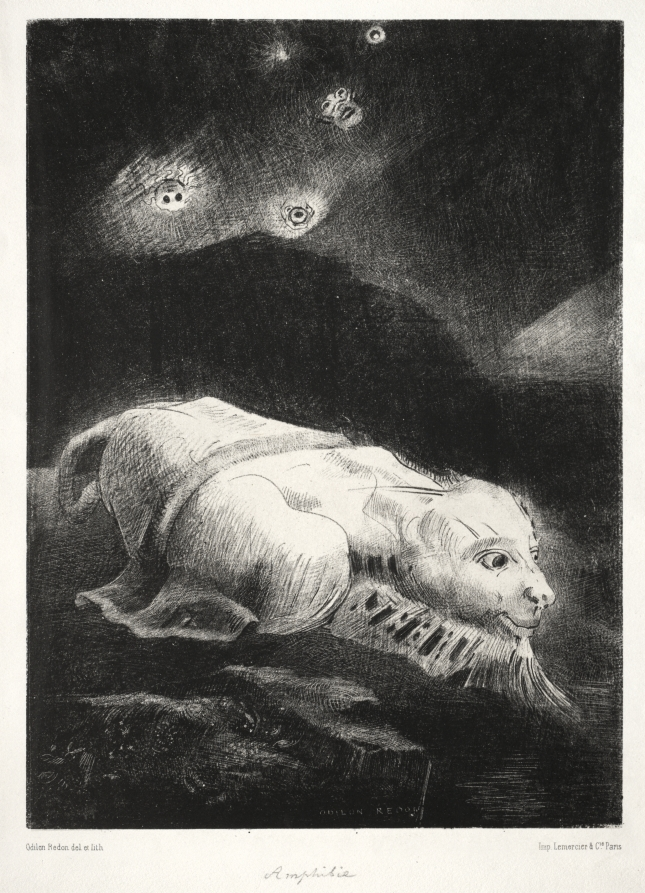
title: When Life Was Awakening in the Depths of Obscure Matter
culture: France, 19th century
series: Origins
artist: Odilon Redon (French, 1840–1916)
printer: Lemercier & Cie.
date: 1883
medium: lithograph on China paper laid on wove paper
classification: Print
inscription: signed on stone, bottom center: ODILON REDON; printed, below lower left corner of image: Odilon Redon del et lith; below lower right corner of image: Imp. Lemercier & Cie. Paris; inscribed at center below image, in graphite: Amphibie